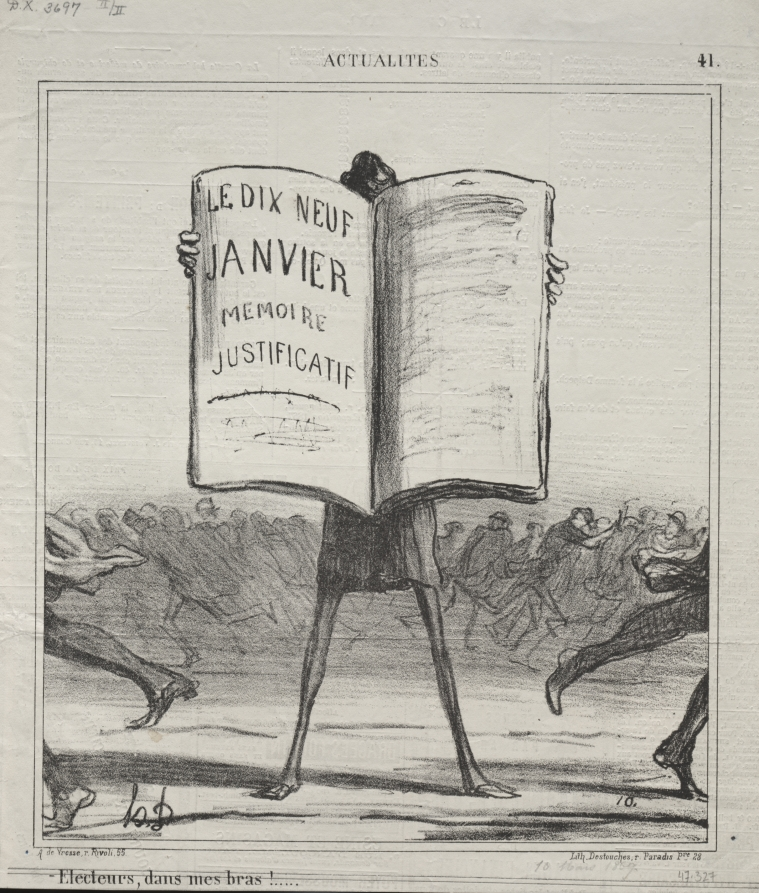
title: Voters, into my arms!...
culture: France, 19th century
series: News of the Day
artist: Honoré Daumier (French, 1808–1879)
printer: Destouches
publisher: Arnaud de Vresse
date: 1869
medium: lithograph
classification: Print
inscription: Upper margin, pencil: D.X 3697 II/II ; lower margin, pencil: 10 Marz 1869 / 47.327 ; Lower margin, printed: A de Vresse, r. Rivoli, 55 / Lith. Destouches, r. Paradis Pre. 28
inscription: Above image, printed: ACTUALITÉS. / 41 ; Below image, printed: -Electeurs, dans mes bras !.....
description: This print was published in Le Charivari (March 10, 1869) as plate 41 from the series News of the Day.